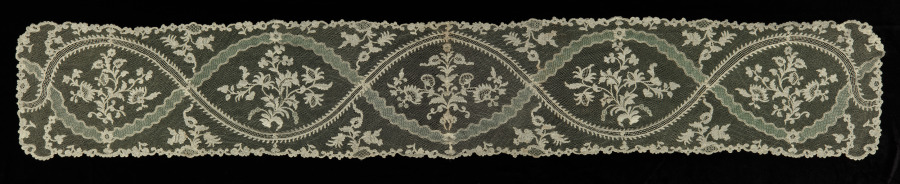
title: Lace Scarf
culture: France, Argentan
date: 1700s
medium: Linen: needle lace (Point de Argentan)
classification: Lace